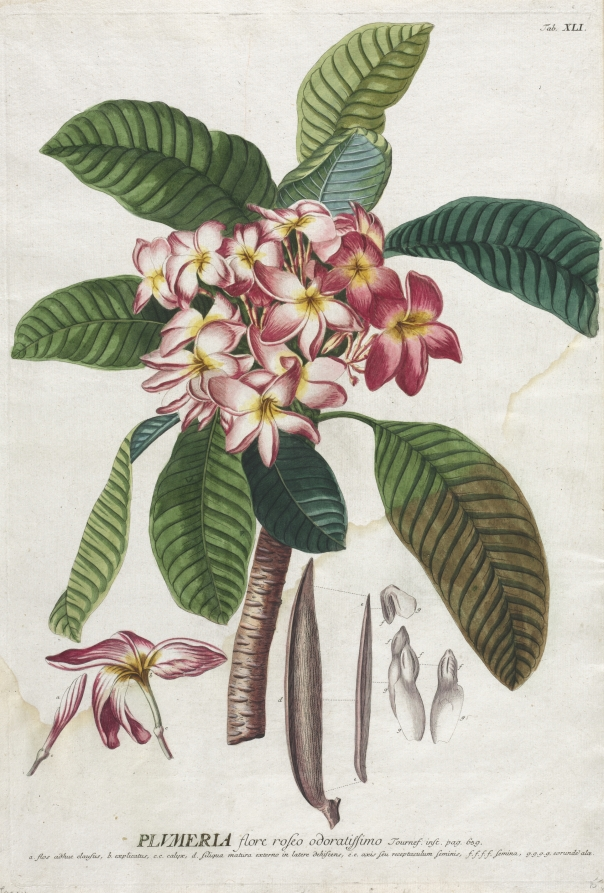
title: Plantae Selectae: No. 41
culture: Germany, 18th century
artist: Georg Dionysius Ehret (German, 1708–1770)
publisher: Christopher Jacob Trew (German, 1695–1769)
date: published 1750–73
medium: engraving, hand-colored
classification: Print